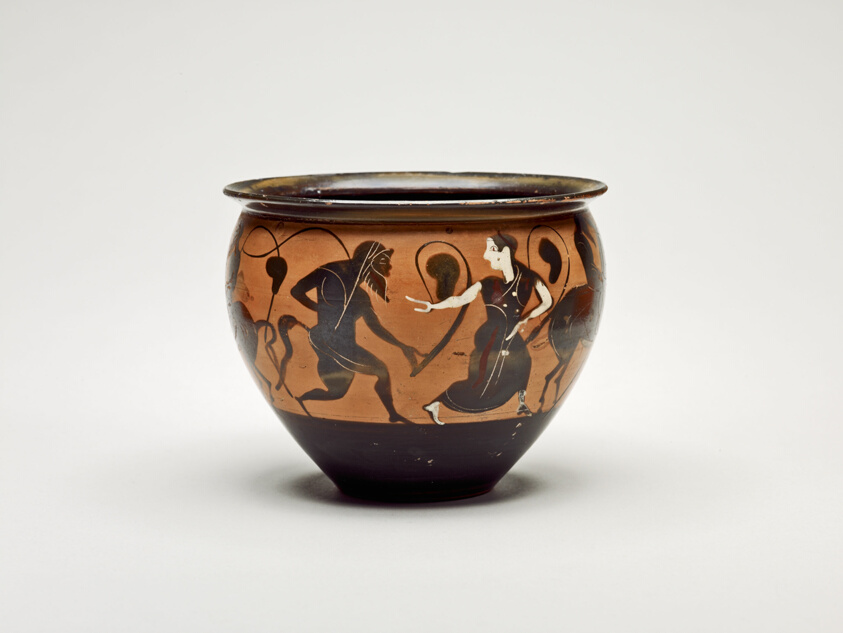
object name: Vessel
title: Mastoid (Drinking Cup)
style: attic, black-figure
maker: Attributed to the Caylus Painter; Greek; Athens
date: about 500-480 BCE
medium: terracotta, black-figure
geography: Athens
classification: drinking vessel; ceramics; vessel; ancient art